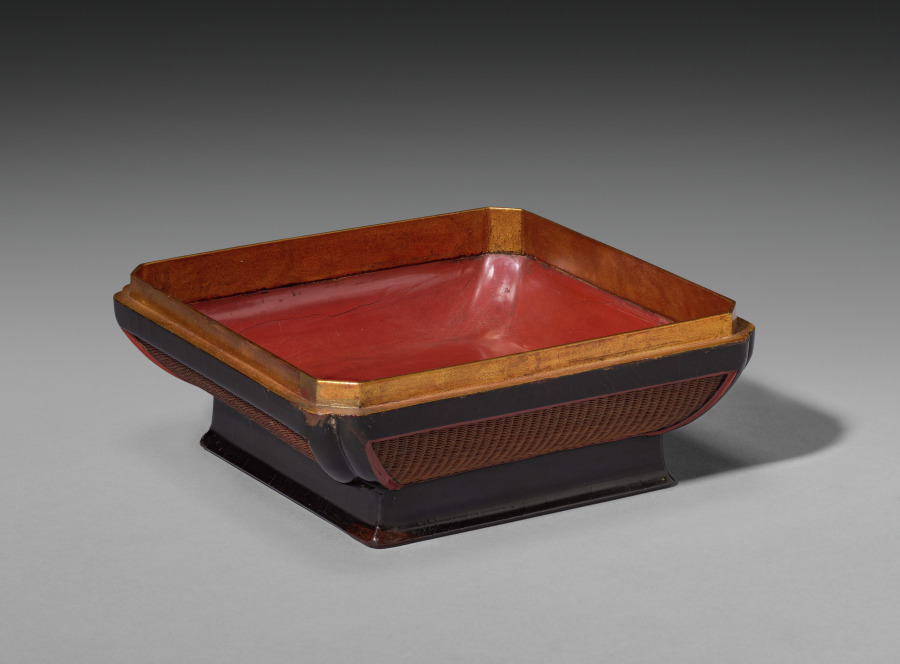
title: Wickerwork Box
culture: China, Ming dynasty (1368-1644), Wanli reign (1572-1620)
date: 1609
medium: lacquered wickerwork (of woven bamboo) framed in wood with circular scene inlaid in mother-of-pearl and gold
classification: Lacquer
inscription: Inscription at bottom in red on black lacquer reads: "commissioned by Yü-Yün-ch'i".